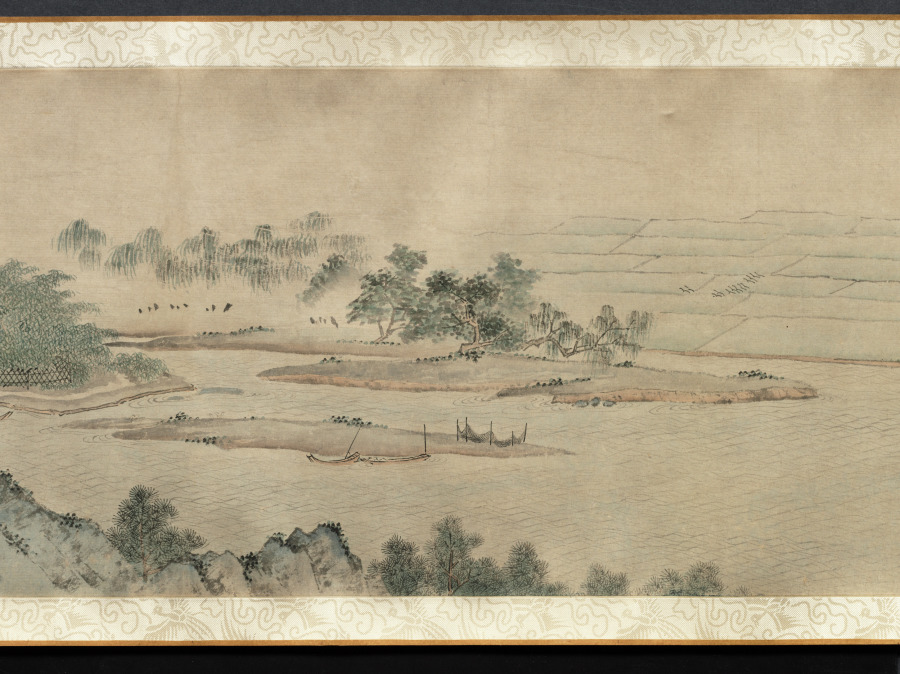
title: Ten Thousand Li of the Yangzi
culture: China, Ming dynasty (1368–1644)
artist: Dai Jin (Chinese, 1388–1462)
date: c. 1400s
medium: Handscroll; ink and color on paper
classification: Painting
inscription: Two colophons at end. Artist's seals: Dai Jin 戴進 and Wenjin 文進.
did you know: Dai Jin is traditionally considered the founder of the Zhe School, a style of landscape painting.